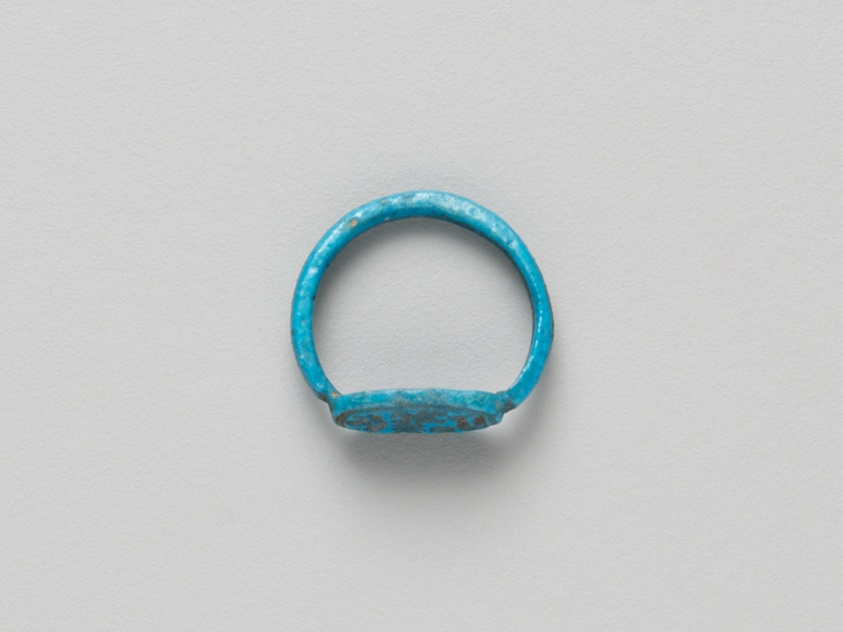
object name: Costume and Accessories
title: Finger Ring with the Throne Name of King Horemheb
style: new kingdom, eighteenth dynasty, ancient, egyptian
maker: Egyptian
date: New Kingdom, Dynasty 18, reign of Horemheb (about 1323–1295 BCE)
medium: Faience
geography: Egypt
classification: ring (jewelry); jewelry; ancient art; costume; faïence (composite material)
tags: Hieroglyphs, jewelry, king